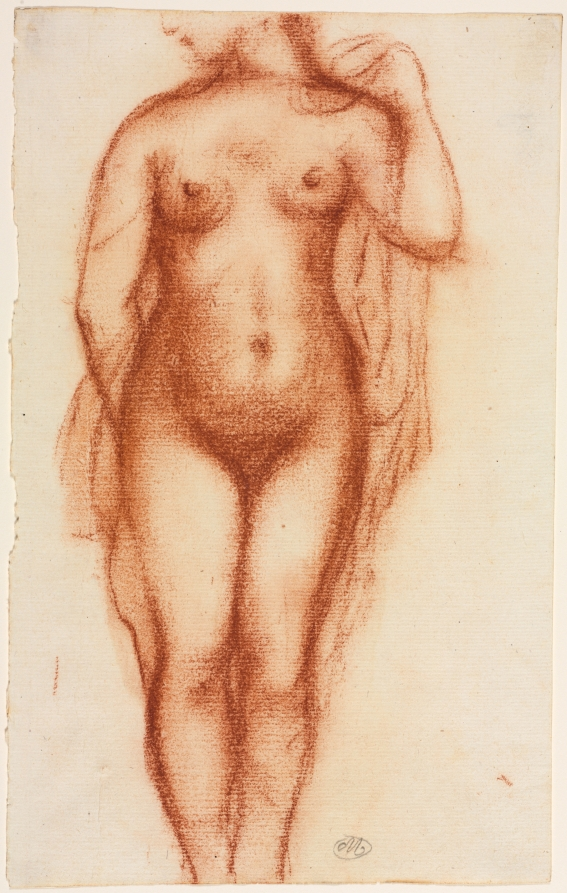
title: Nude Woman Standing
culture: France, 20th century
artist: Aristide Maillol (French, 1861–1944)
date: c. 1885–1926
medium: sanguine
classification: Drawing